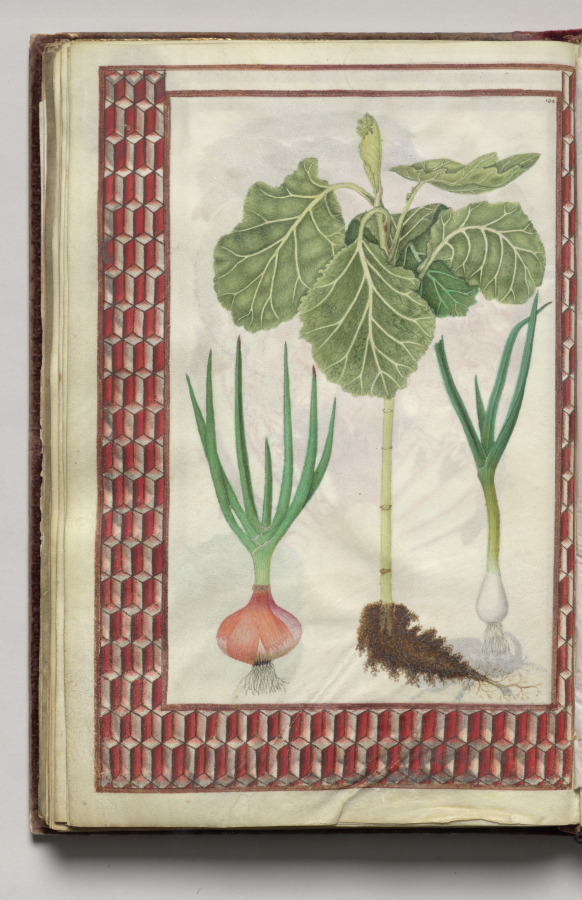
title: Two Onions and a Cabbage with Geometric Border, folio 45 (verso), from Florilegium (A Book of Flower Studies)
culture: France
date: 1608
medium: watercolor, ink, silver, and gold over occasional traces of pencil, on vellum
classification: Bound Volume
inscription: Dated: Poitiers 1608 (on frontispiece) Signed: On frontispiece in black ink, lower right: Van Kuyk Notation on drawing: Frontispiece: in pencil, lower margin: * élève de Van Kessel, peintre flammand (* in pencil also appears in front of Van Kuyk's name).